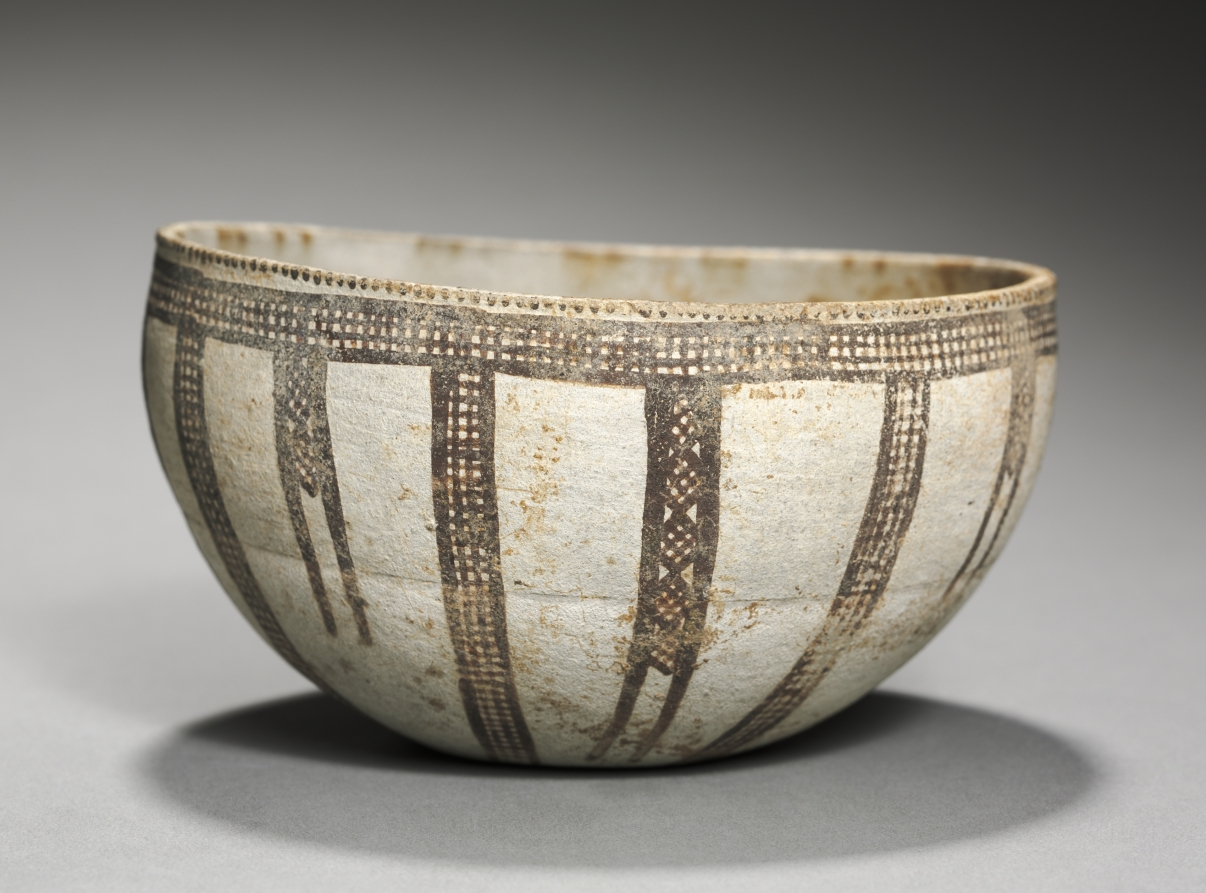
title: One-Handled Bowl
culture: Cyprus, late Cypriot II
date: c. 1450–1200 BCE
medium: white slip ware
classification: Ceramic